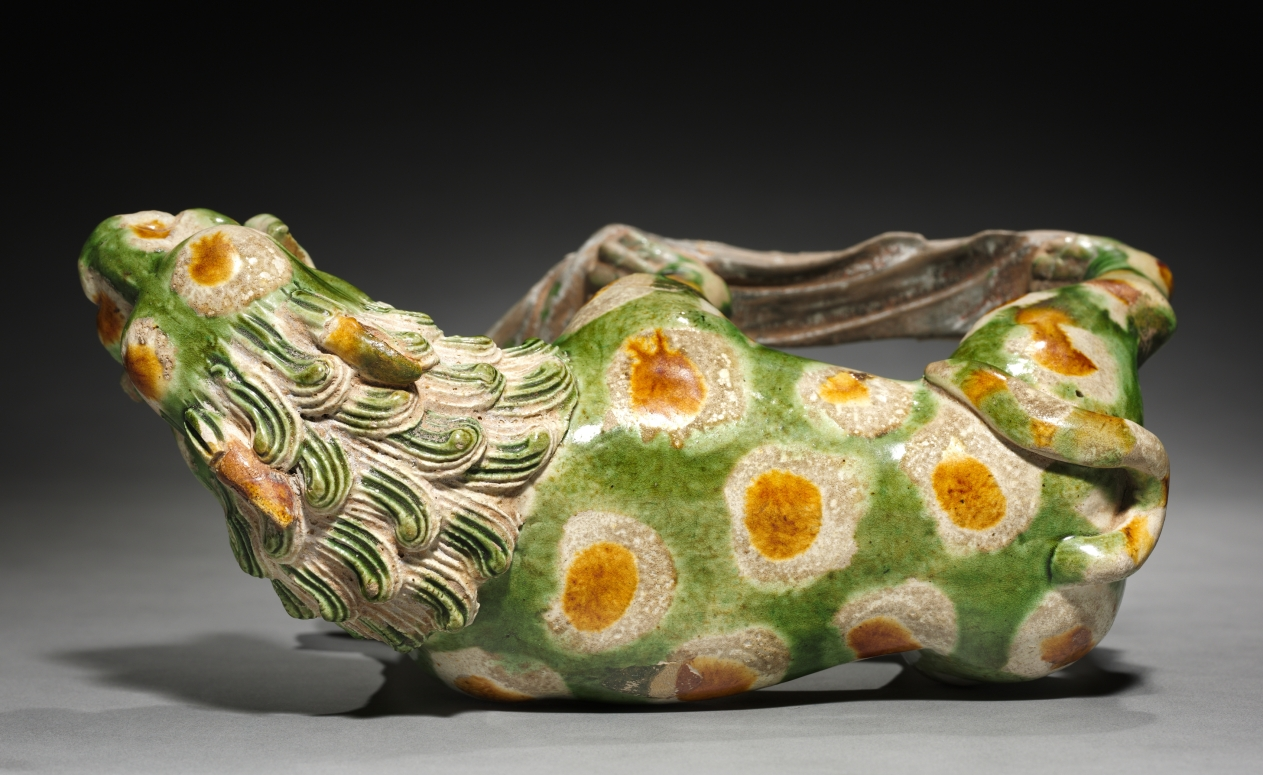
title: Lion with Cub in Mouth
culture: China, Tang dynasty (618-907)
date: 618–907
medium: earthenware with polychrome glaze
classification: Sculpture